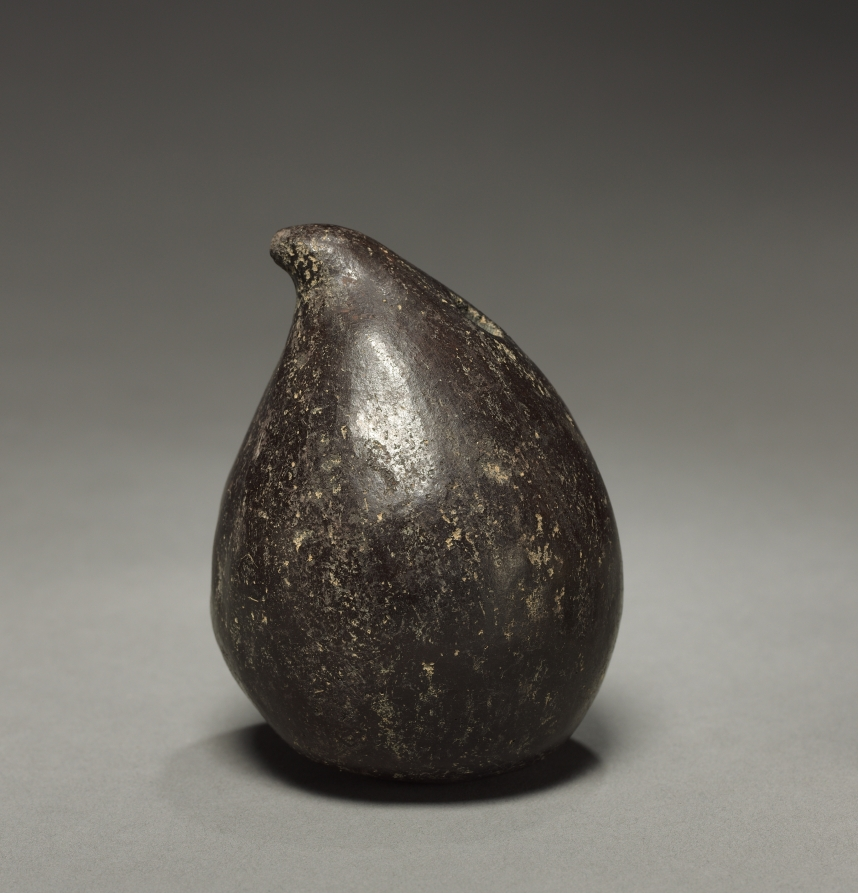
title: Fruit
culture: Colombia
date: before 1921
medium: pottery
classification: Ceramic